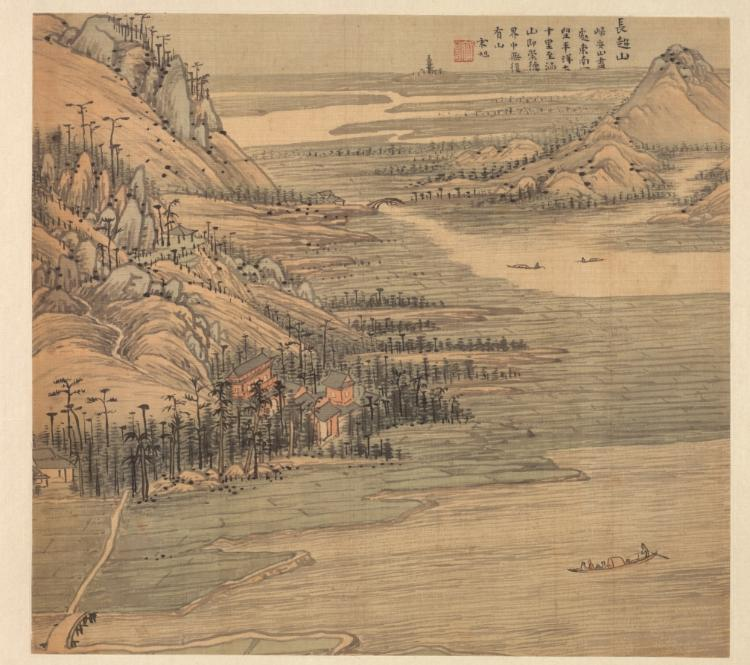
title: Mt. Changchao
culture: China, Jiaxing, Ming dynasty (1368–1644)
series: Eighteen Views of Huzhou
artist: Song Xu (Chinese, 1525-c. 1606)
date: c. 1588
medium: Album leaf; ink and color on silk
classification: Painting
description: By the 1500s, visits to historic and scenic sites in the lower Yangzi delta stimulated an increase of printed illustrated travel books. Topographical depictions of local scenery flourished. Leaves from this album illustrates sites around Lake Tai of the two adjacent counties Changxing and Wuxing (modern Huzhou). Song Xu, who lived intermittently in Jiaxing and Songjiang, must have passed through Wuxing by boat and thus knew the region. The paintings are inscribed with gazetteerlike notations, suggesting that the album was produced for clients as commemorative works, a travel guide, or for “armchair travel” (woyou) in one’s mind.